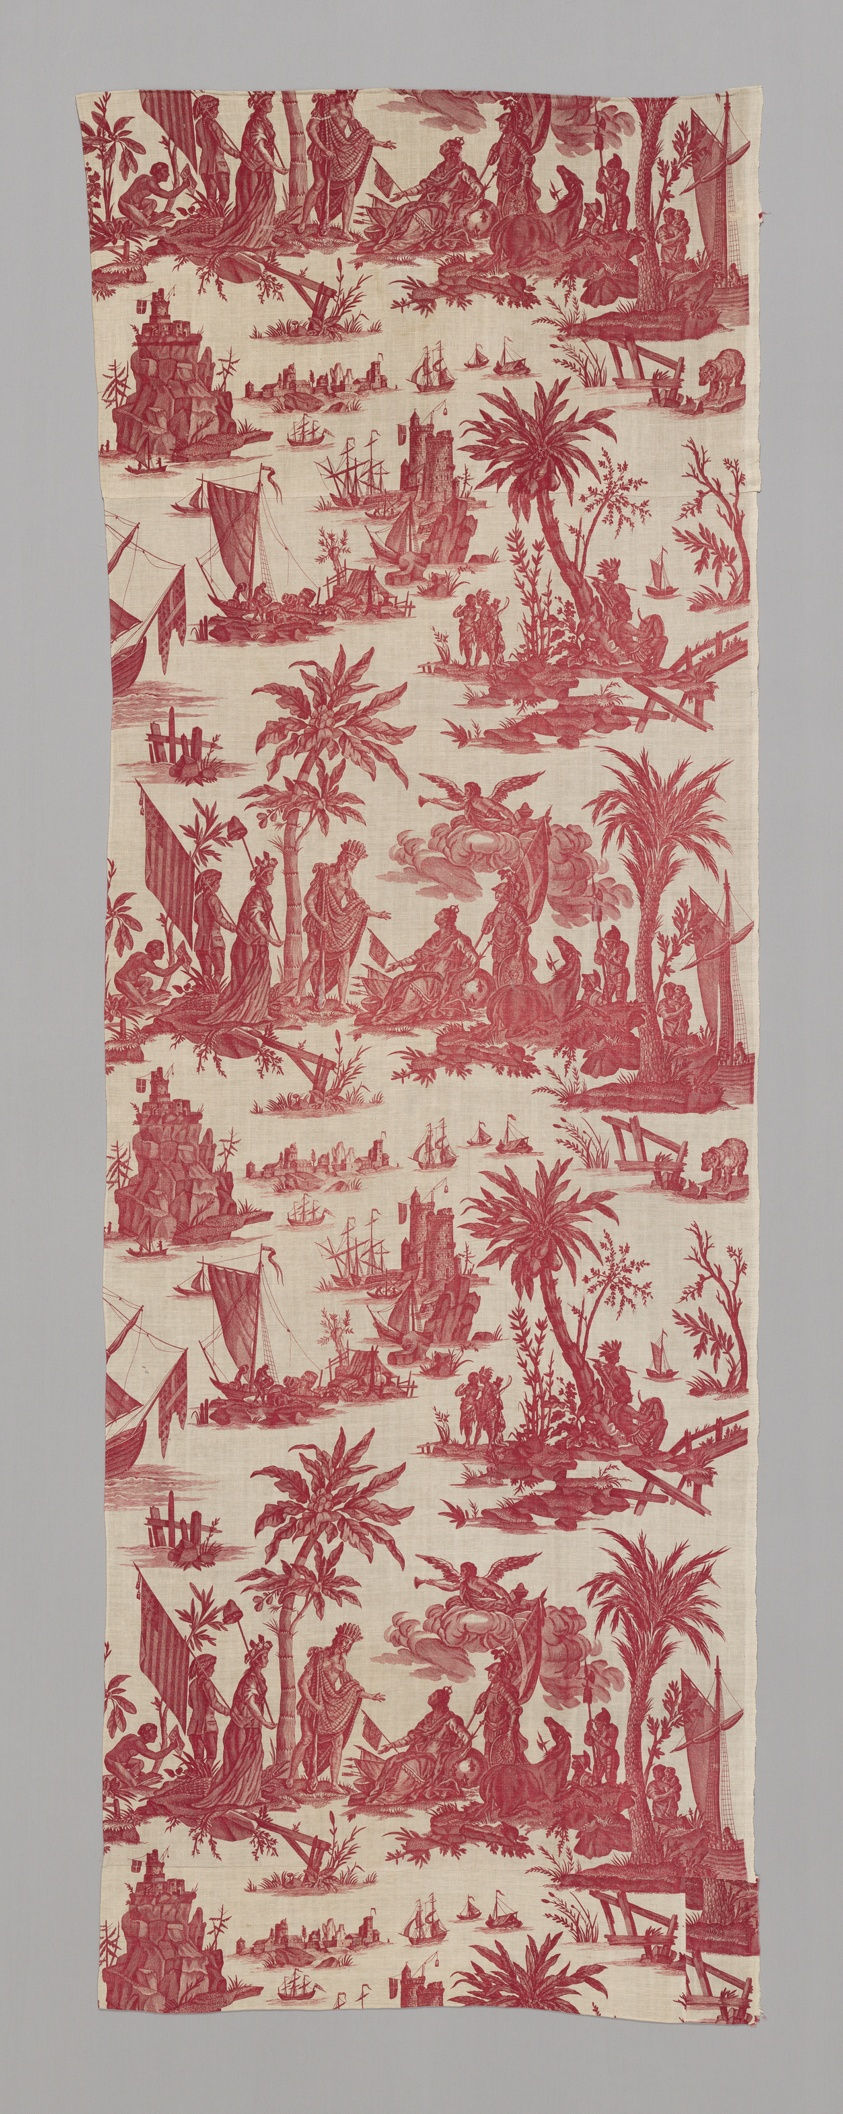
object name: Textile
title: L'Hommage de l'Amérique á la France (America's Tribute to France) (Furnishing Fabric)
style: jouy-en-Josas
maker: Design attributed to Jean Baptiste Huet (French, 1745–1811); Manufactured by Christophe-Philippe Oberkampf (naturalized French, 1738-1815), Oberkampf Manufactory (French, 1760-1843); Jouy-en-Josas, France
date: c. 1780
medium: Cotton, plain weave; copperplate printed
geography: Jouy-en-Josas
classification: weaving - printed; textile; furnishing textile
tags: red (color), angels, plants, ships, indigenous, white (color)